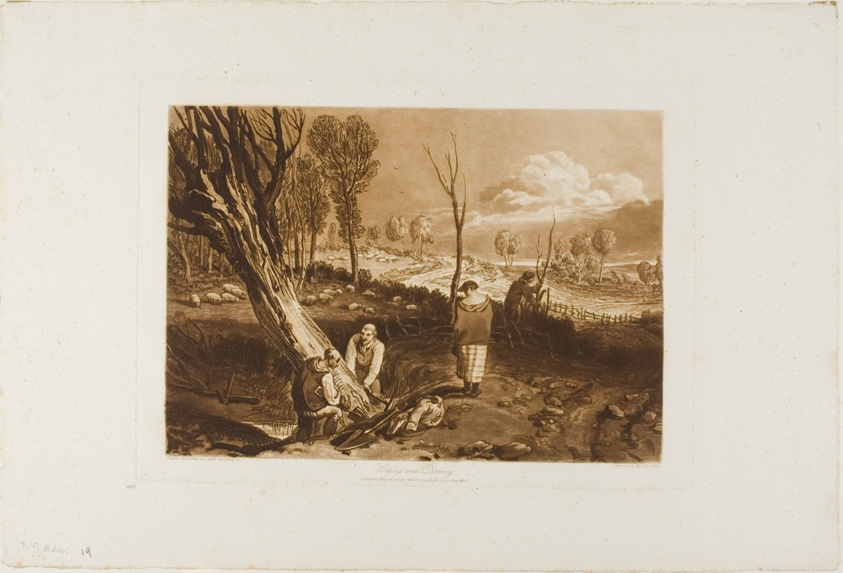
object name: Print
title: Hedging and Ditching, plate 47 from Liber Studiorum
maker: Joseph Mallord William Turner (English, 1775-1851); Engraved by J.C. Easling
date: published May 23, 1812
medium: Etching and engraving in brown on off-white paper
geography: England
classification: etching; print; prints and drawing